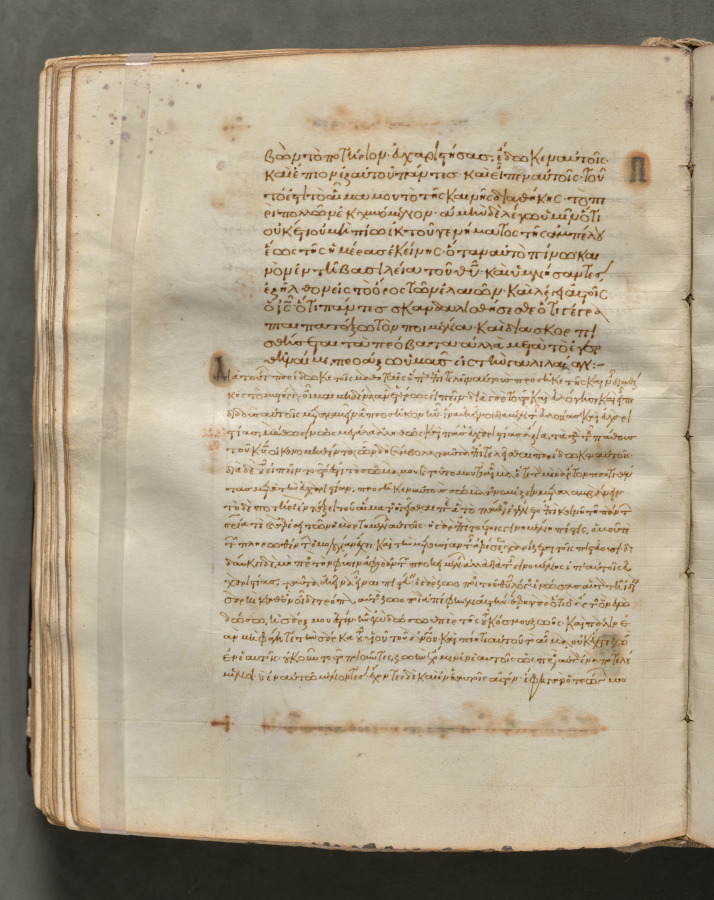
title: Text, folio 188 (verso), from a Gospel Book with Commentaries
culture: Byzantium, Constantinople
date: c. 1000–1100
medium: ink, tempera, and gold on vellum; leather binding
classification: Bound Volume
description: Each of the four gospels in this book opens on a page with brilliantly illuminated borders depicting the author of the text as well as birds-principally peacocks, symbols of the immortality of the soul-and fountains, representing the fountain of life and the salvation of the soul. This volume consists of 428 leaves with texts in Greek. Its level of sophistication suggests that it was probably written and decorated in a monastery in Constantinople.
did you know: Gospel Books were carried in procession through Byzantine churches.